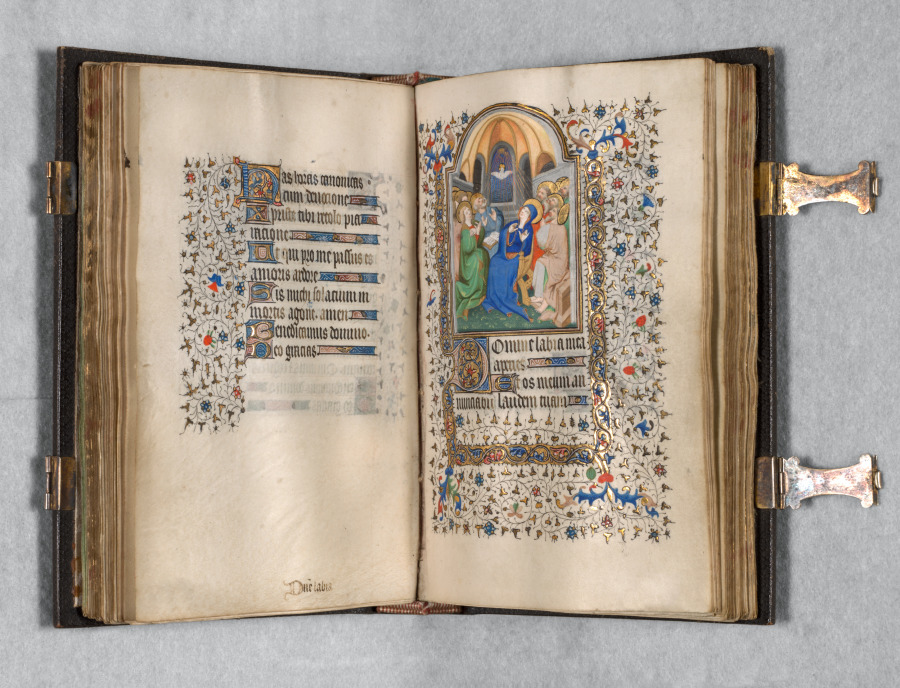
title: Book of Hours (Use of Paris): Fol. 108r, The Pentecost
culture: France, Paris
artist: possibly studio or workshop of The Bedford Master (French, Paris, active c. 1405–30)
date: c. 1420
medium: ink, tempera, and gold on vellum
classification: Bound Volume